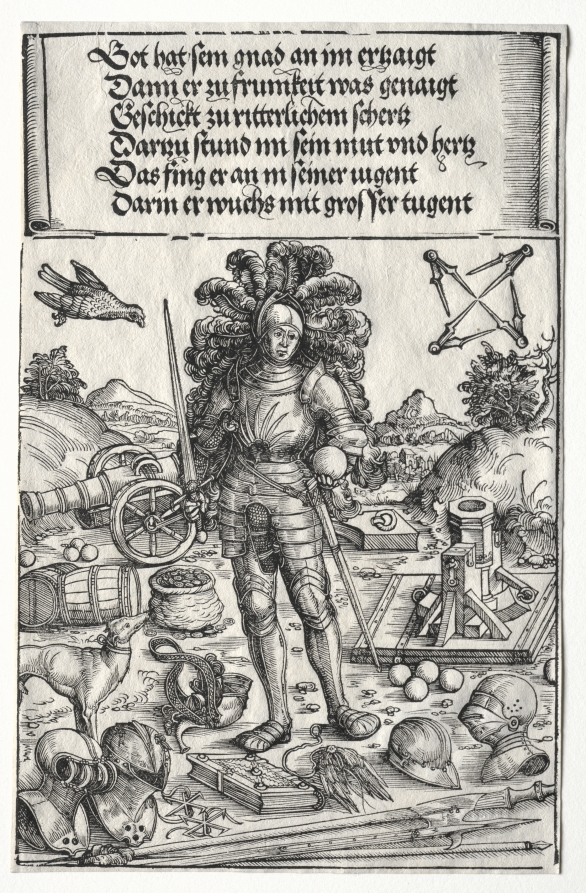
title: The Triumphal Arch of Maximilian I: Emperor Maximilian as Patron of Improvements in Artillery and Armor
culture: Germany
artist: Wolf Traut (German, c. 1486–1520)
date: 1515–17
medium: woodcut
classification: Print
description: Dressed in a full suit of armor, Maximilian (reigned 1486– 1519) stands among an array of helmets and weaponry. He holds a sword in one hand and a cannonball in the other, indicating both knightly skill and military power. A large sack of coins behind him alludes to his financial support of the engineers and craftsmen dedicated to the industry of war. Similar suits of armor in the Maximilian style are on view in the museum’s arms and armor court, including Maximilian’s personal suit of jousting armor. Traut created this woodcut for a monumental triumphal arch, printed with 195 woodblocks prepared by a team of printmakers. The emperor commissioned the massive print—almost 12 feet tall when assembled— to commemorate his gentility, generosity, and military conquests.